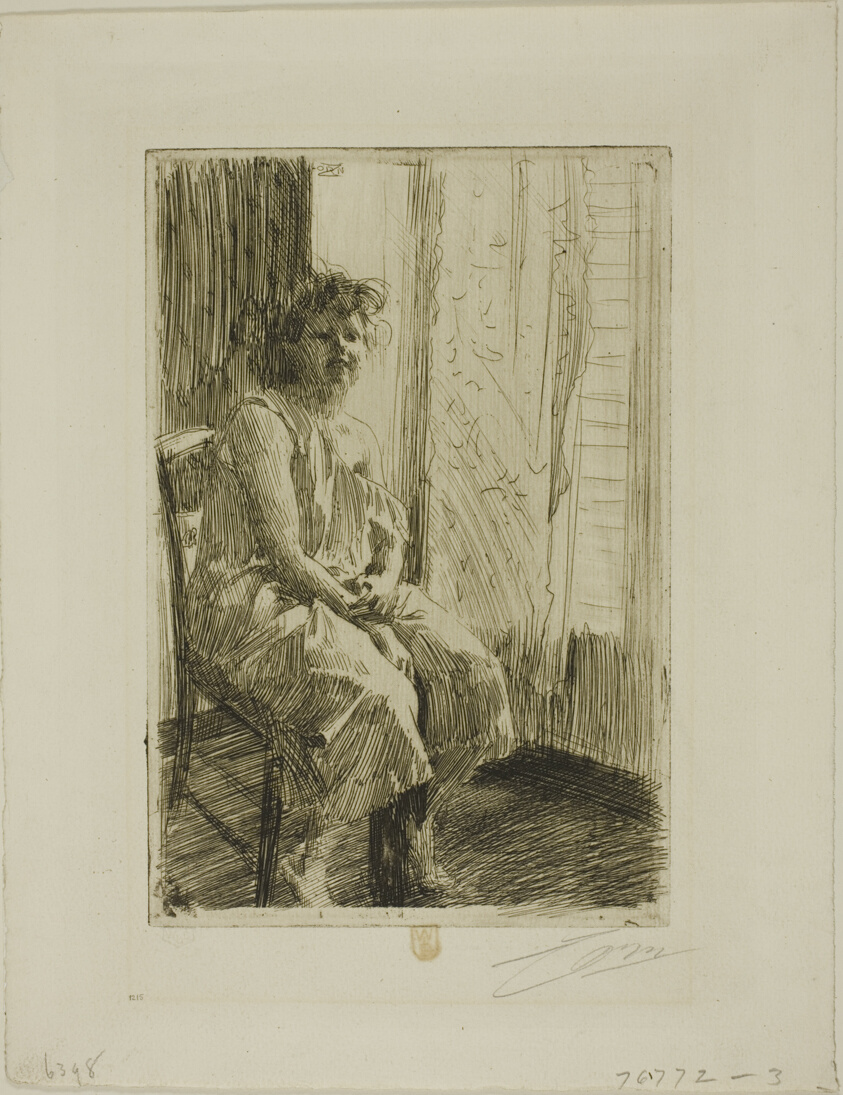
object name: Print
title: Morning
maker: Anders Zorn (Swedish, 1860-1920)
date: 1891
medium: Etching on ivory laid paper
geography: Sweden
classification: etching; print; prints and drawing